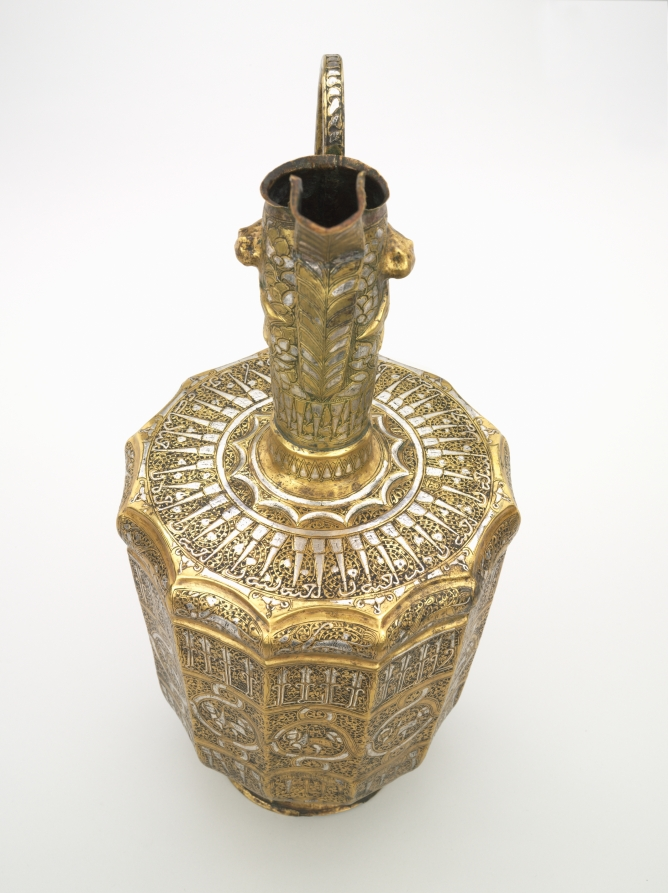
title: Twelve-sided Ewer with Sphinxes and Human-Headed Inscriptions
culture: Iran, Khurasan, Ilkhanid period (1256–1353)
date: 1300–1350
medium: hammered sheet of brass inlaid with silver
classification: Metalwork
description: The spout and neck of the ewer display a crouching and seated lion in raised relief. Winged hare-like animals march around the top of the body, set off by foliate scrolls, while sphinxes process around the center. The bottom of the ewer’s body is encircled by an inscription with human heads, which only appear on metalwork in Islamic art. Ewers like this, and similar elaborate vessels, would have been used in court banquets and elite homes across the Islamic world.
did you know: Calligraphy with human heads, known as animated script, developed in northeast Iran during the 1100s.